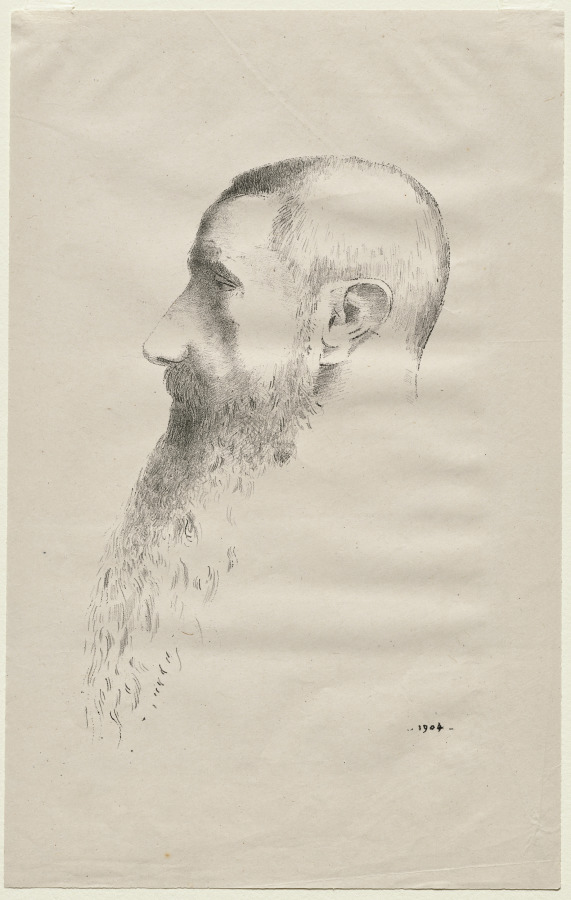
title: Roger Marx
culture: France, early 20th Century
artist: Odilon Redon (French, 1840–1916)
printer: Auguste Clot (French, 1858–1936)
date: 1904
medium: lithograph on China paper laid on wove paper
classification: Print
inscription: Inscribed in stone at lower right below image: 1904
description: Later in life, Odilon Redon turned to portraiture, creating likenesses of both commissioned sitters and his close friends. This print represents a figure central to his artistic and social milieu: Roger Marx was an influential critic who championed Redon’s work. Redon depicted only the head and profile of his subject, sketching Marx with fine and delicate detail. He produced just a small number of impressions of the lithograph, accentuating its personal and intimate theme.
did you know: Roger Marx (1859–1913), was an influential collector in addition to his work as an art critic.